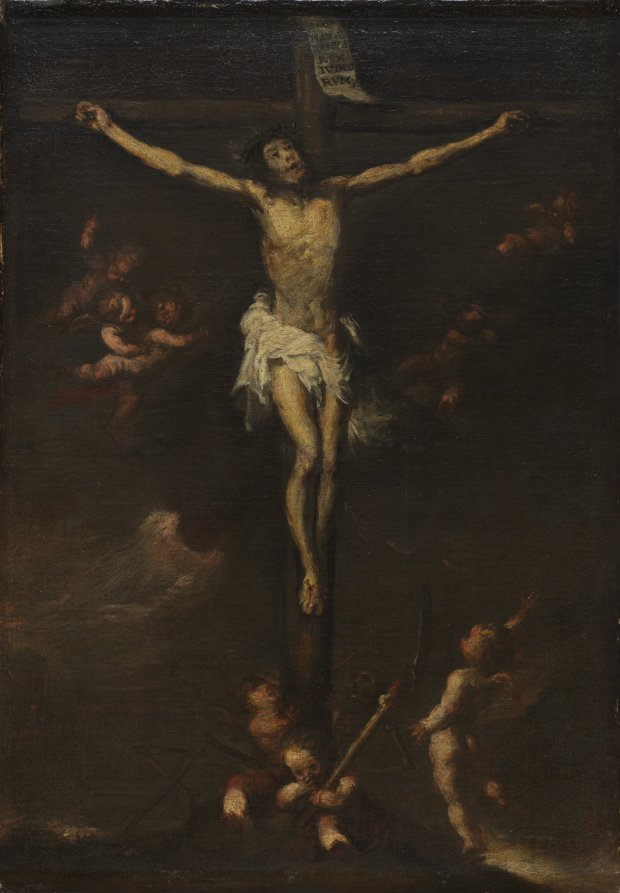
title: Crucifixion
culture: Spain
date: 1800s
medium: oil on canvas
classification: Painting